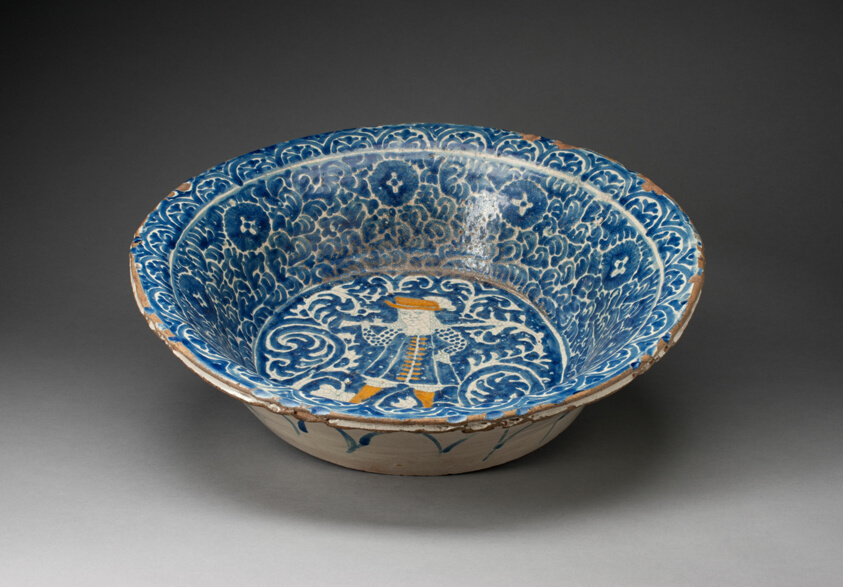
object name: Vessel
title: Basin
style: spanish colonial, european, Arts of the Americas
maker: Talavera poblana; Puebla, Mexico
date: 1650–1750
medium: Tin-glazed earthenware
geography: Puebla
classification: earthenware; european decorative arts; ceramics; vessel; art of the americas